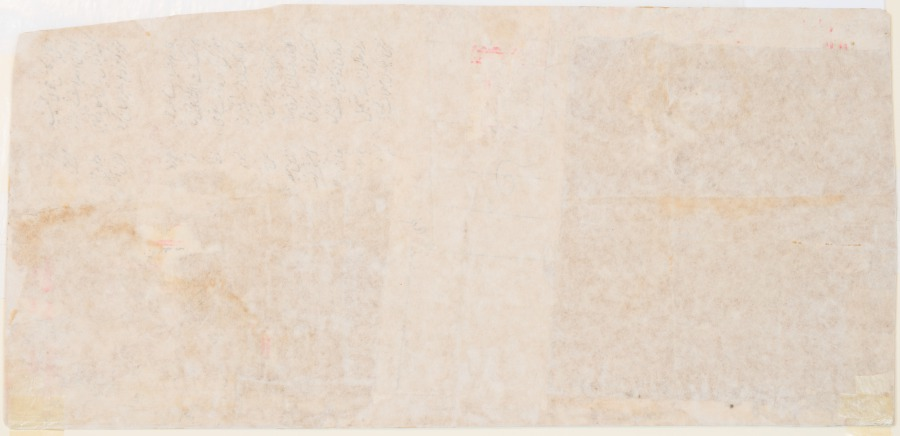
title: Rao Ram Singh I’s Elephant Gone Amok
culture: Northwestern India, Rajasthan, Rajput Kingdom of Kota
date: c. 1700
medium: gum tempera, ink, and gold on paper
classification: Drawing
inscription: gaja nahāna rāma sīga jī kī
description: A royal elephant, named Nahan, according to the inscription, is attempting to free itself by breaking the chain. His ears are flexed forward, and his great mass overwhelms the five men trying to control the elephant with spears and firecrackers tied to sticks. The artist used gold in the elephant’s eye to emphasize the intensity of expression.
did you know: The tusks are ornamented with gold rings, and the sharp tips have been trimmed.